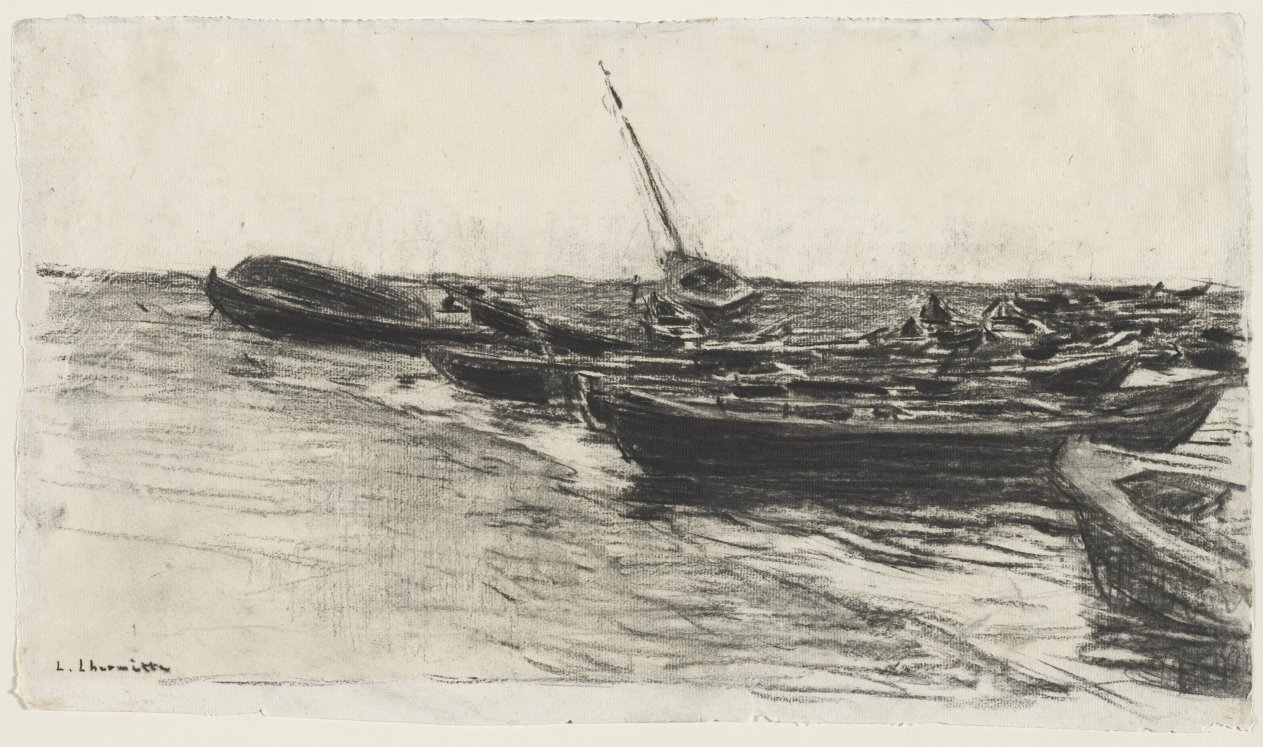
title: Fishing Boats on the Beach at Étretat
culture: France, 19th century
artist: Léon Augustin Lhermitte (French, 1844–1925)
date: August 1865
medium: charcoal (stumped)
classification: Drawing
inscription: signed, lower left, in black charcoal: L. Lhermitte